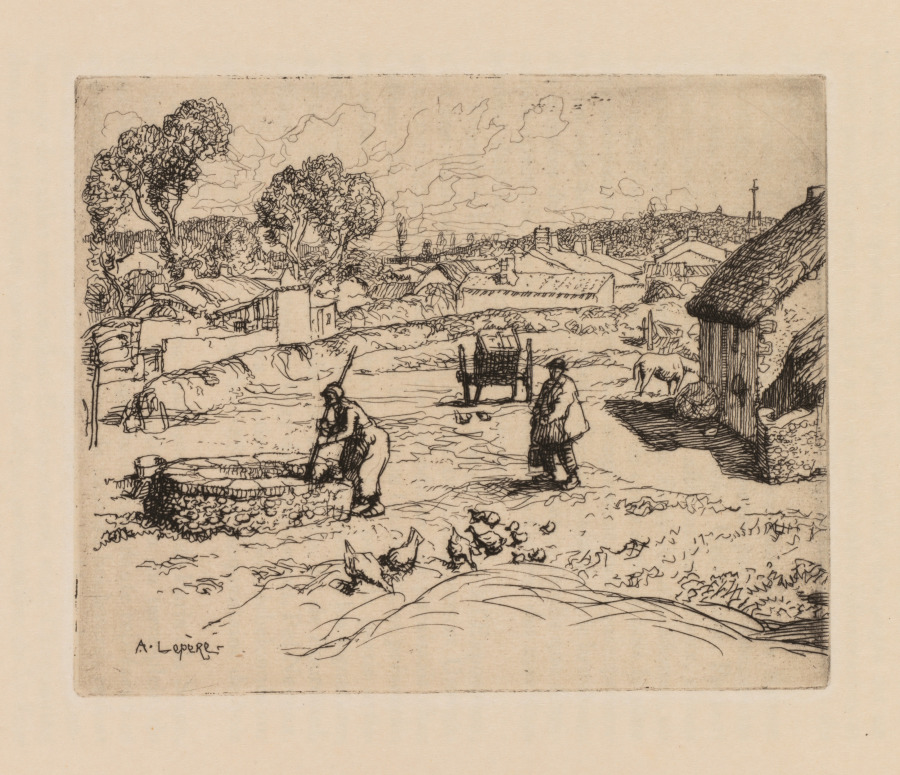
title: Auguste Lepère: La Masure (Vendèe)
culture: France, 20th century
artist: Auguste Louis Lepère (French, 1849–1918)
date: 1931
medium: Etching, from bound volume with seven etchings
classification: Bound Volume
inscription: On tissue guard, lower right: 362. LA MASURE (VENDÉE) On plate, lower left margin: A. Lepère